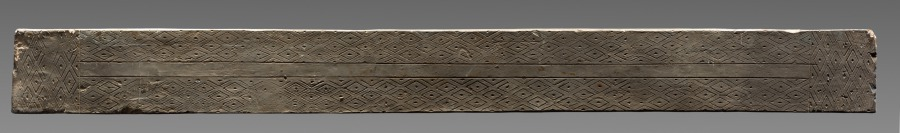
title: Tomb Tile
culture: China, Henan province, Jincun, Eastern Zhou dynasty (770–256 BCE)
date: 771–256 BCE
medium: earthenware with stamped decoration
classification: Ceramic